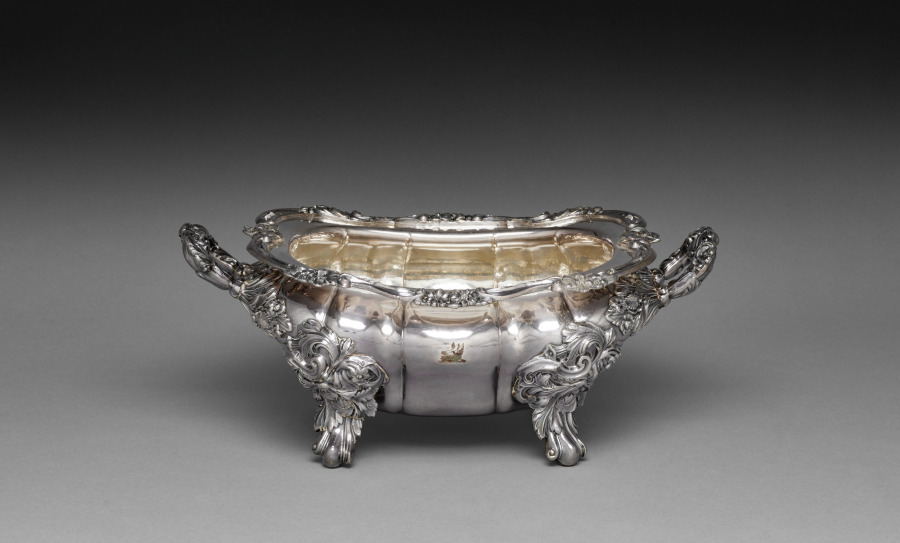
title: Tureen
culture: England, Sheffield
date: c. 1830–50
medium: Silver plated on copper (Old Sheffield Plate)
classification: Silver